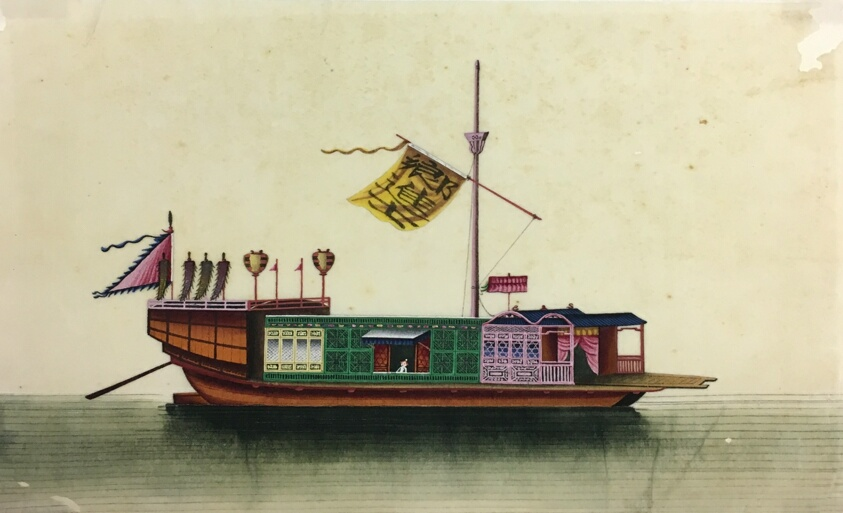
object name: Painting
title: Ship paintings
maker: China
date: mid 19th century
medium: Album of ten leaves; watercolor on paper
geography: Guangdong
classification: painting; asian art